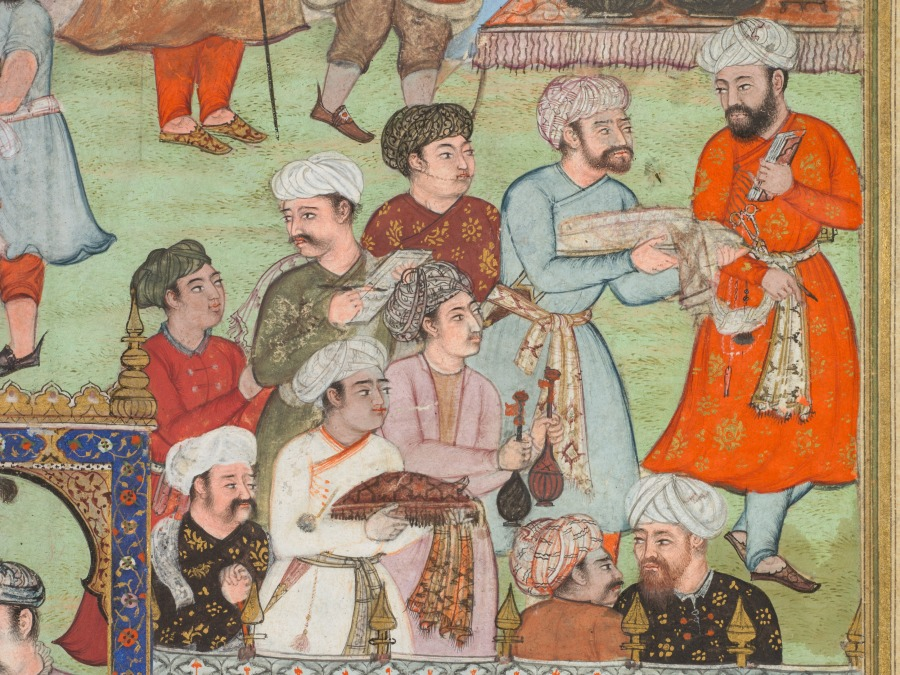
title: A feast for Babur hosted by his half-brother Jahangir Mirza in Ghazni in May 1505, from a Babur-nama (Memoirs of Babur)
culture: India, Mughal, 16th century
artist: Basavana (Indian, active c. 1560–1600)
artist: and Madhav Khurd (Indian, active late 1500s)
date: c. 1589; outer margins added c. mid-1900s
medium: Gum tempera and gold on paper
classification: Painting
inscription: verso: Persian text, in nasta‘liq script: . . . presented many gifts. In that year most of the rivers had become very swollen, to the extent that the Dih-i Ya‘qub River could not be forded. I brought the boat I had made at the lake and floated it in the waters of Dih-i Ya‘qub opposite Kamri and all the people crossed by boat. For this reason we went through the Sajavand pass and straight through crossing the river at Kamri by boat. We arrived at Kabul in the month of Dh’ul-Hijja [May 1505]. A few days earlier, Sayyid Yusuf Beyg had died of colic. At Kush Gunbad, Nasir Mirza had requested leave and remained behind to get provisions for his retinue from his own domain, saying he would follow in two or three days. Once he had left us he sent his entire army to the Nur valley on account of a minor act of disobedience by the people of the Nur valley. [Given] its rice fields and the location of its citadel on the peak of the mountain as . . .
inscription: recto: Persian inscription in bottom margin, in nasta‘liq script: the work of Basavana / [ . . . ] / Madhav Khurd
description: Twenty-one years before his conquest of Delhi, Babur took control of territories in Afghanistan, including the cities of Kabul and Ghazni. His half-brother, who controlled the region around Ghazni, ordered that a party be thrown in honor of Babur’s arrival from the north. Drinking parties and feasts in lavish movable tent settings, where gifts were exchanged, alliances forged, and relationships cemented, were as important to the building of the empire as the battles.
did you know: A manager directs servers to bring spoons and lay out the buffet table.